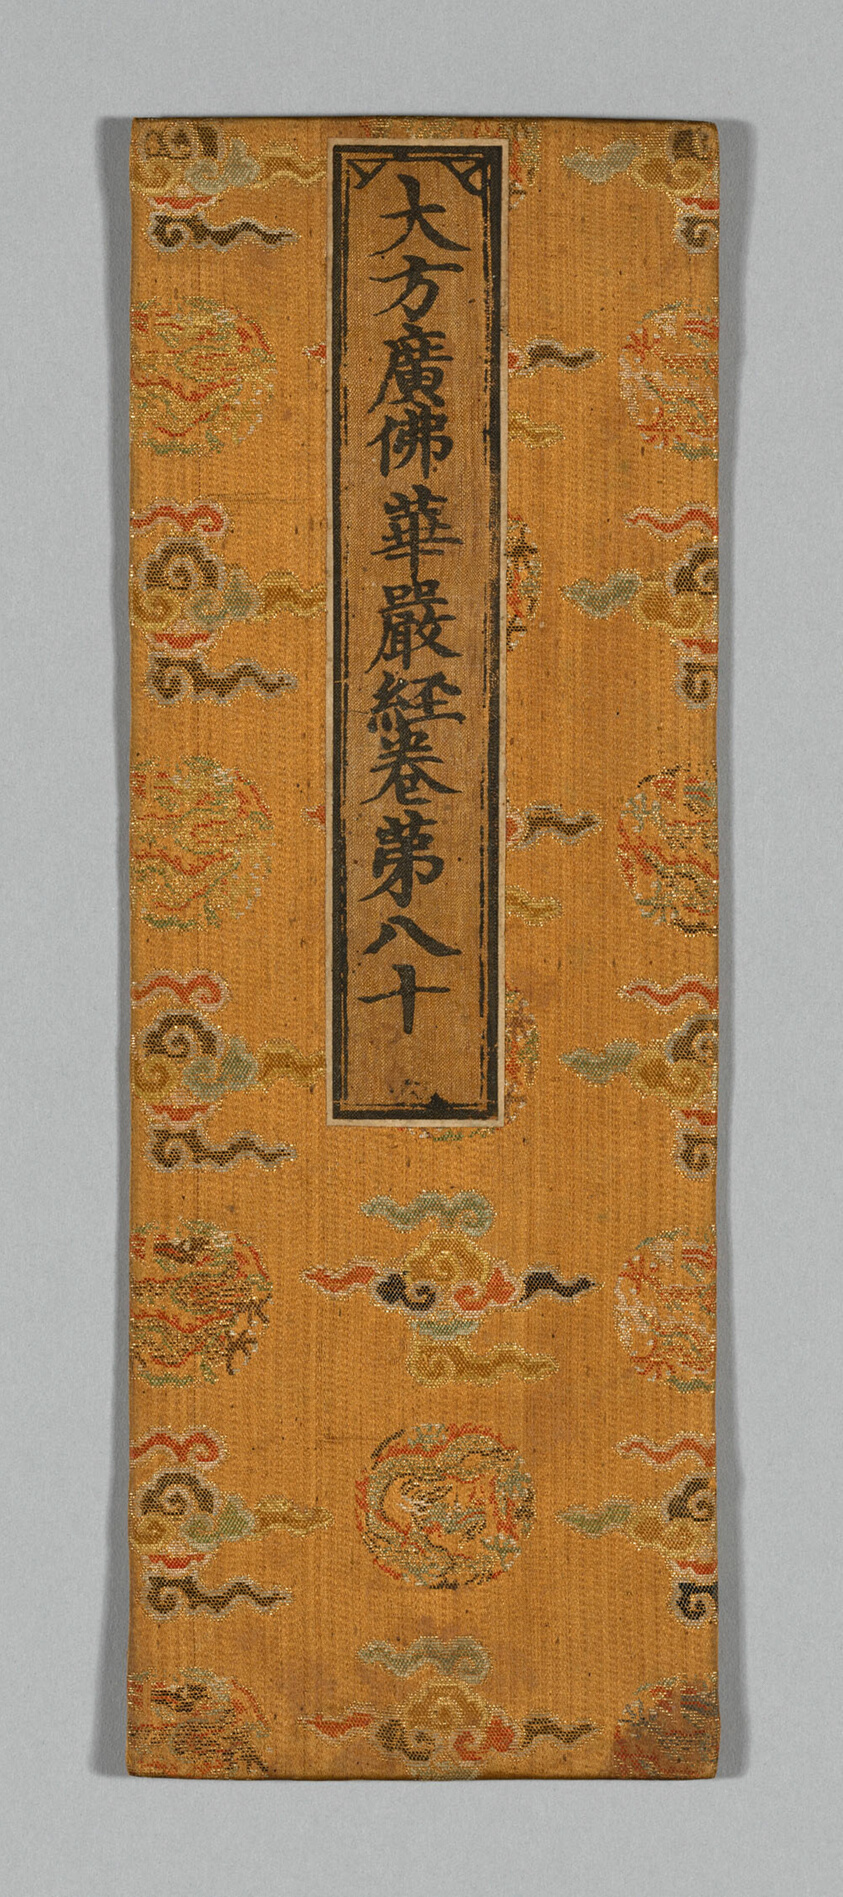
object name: Textile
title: Sutra Cover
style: ming, Chinese (culture or style), East Asian, asian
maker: China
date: Ming dynasty (1368–1644), c. 1590s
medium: Silk and gold-leaf-over-lacquered-paper strips, satin weave with patterning wefts; wrapped over cardboard and backed with paper; applied label of silk, plain weave; with inscribed title painted and/or printed with ink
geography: China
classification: textile; weaving